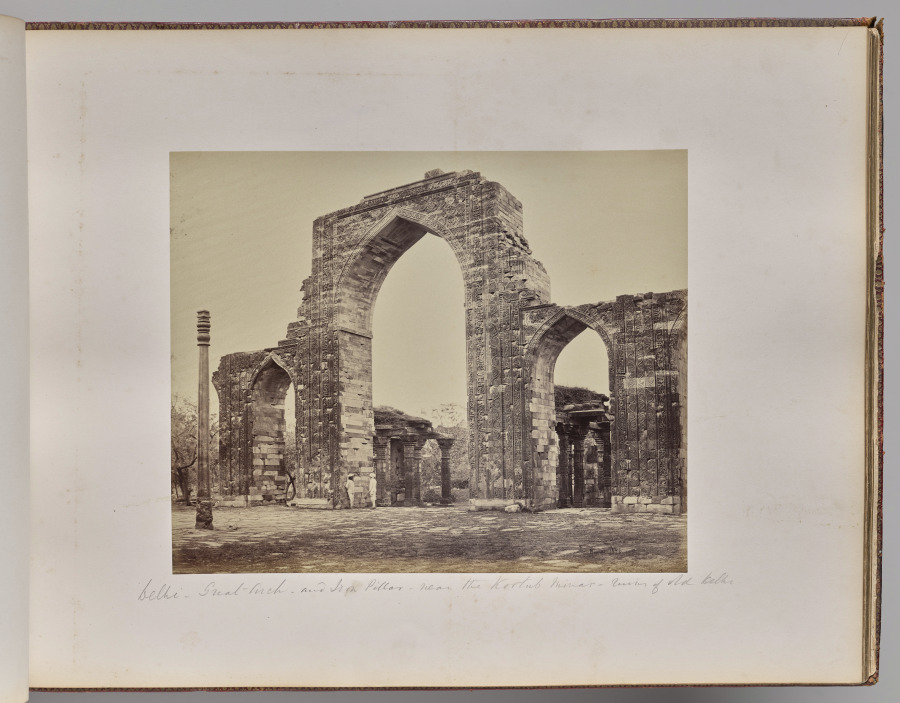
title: Delhi. Great Arch and Iron Pillar Near the Kootub Minar, Ruin of Old Delhi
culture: England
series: Photographs of Northern India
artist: Samuel Bourne (British, 1834–1912)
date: 1863–70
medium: albumen print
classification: Photograph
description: The 50 images in this album, all taken in the 1860s, move from the hill towns of the Himalayas down to cities including Lahore (now in Pakistan), Delhi, Lucknow, Agra, Benares (now Varansi), and Calcutta (now Kolkata). Architectural studies of major monuments offer valuable historical records of what sites such as the Taj Mahal and the imperial mosque of the Mughal emperors in Delhi looked like before twentieth-century restorations.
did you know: Samuel Bourne, the author of most the images in this album, was a banker in England before he moved to India to become a professional photographer.